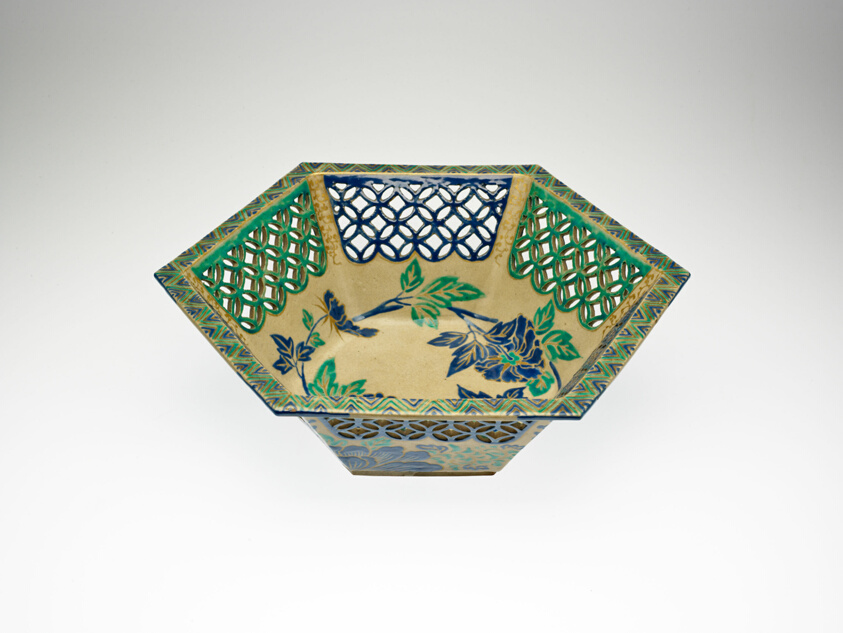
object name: Decorative Arts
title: Openwork Hexagonal Ko-Kiyomizu Ware Bowl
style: Japanese (culture or style)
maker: Unknown artist; Japanese, 18th century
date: 1731–52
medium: Stoneware with overglaze enamels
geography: Japan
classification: bowl; dish (vessel); decorative arts